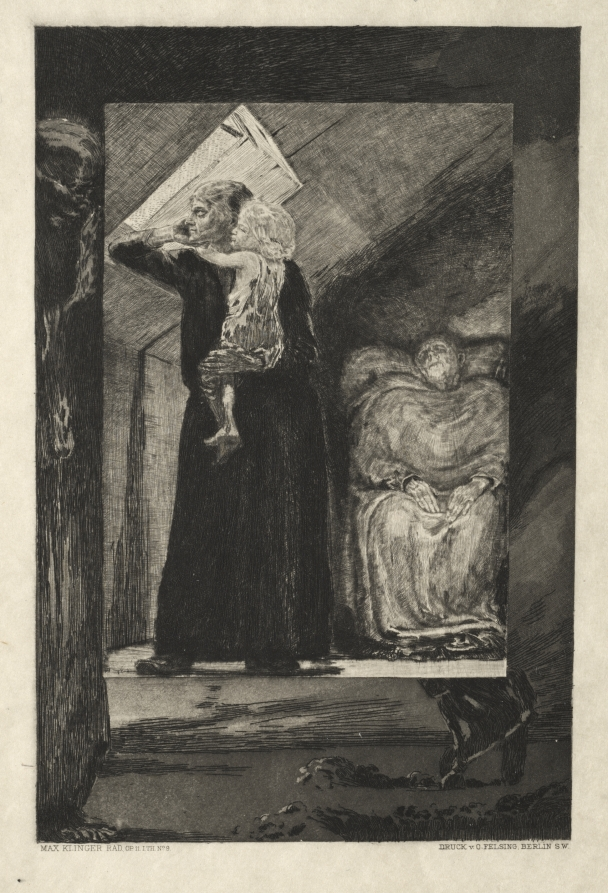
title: Vom Tode I (Opus II, 1889) No. 9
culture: Germany, late 19th century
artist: Max Klinger (German, 1857–1920)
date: 1889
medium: etching and aquatint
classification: Print